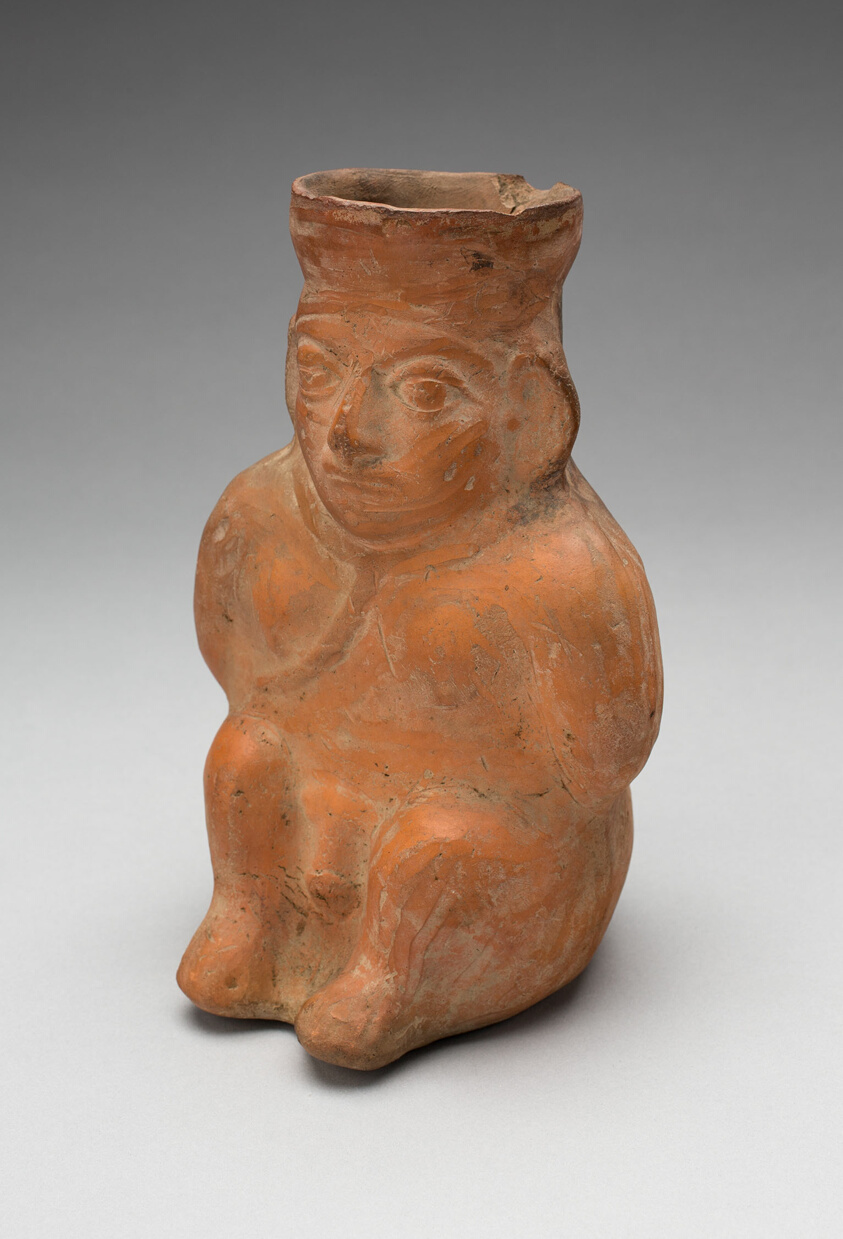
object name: Vessel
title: Jar in the Form of a Captive with Modeled Head, Rope Encircling Neck, and Tied Hands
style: moche, mochica, early intermediate period, Pre-Columbian, americas, Arts of the Americas, andean, andes, south american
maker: Moche (North coast, Peru)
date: 100 BCE–500 CE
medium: Ceramic and pigment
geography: Peruvian North Coast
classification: earthenware; ceramics; vessel; art of the americas